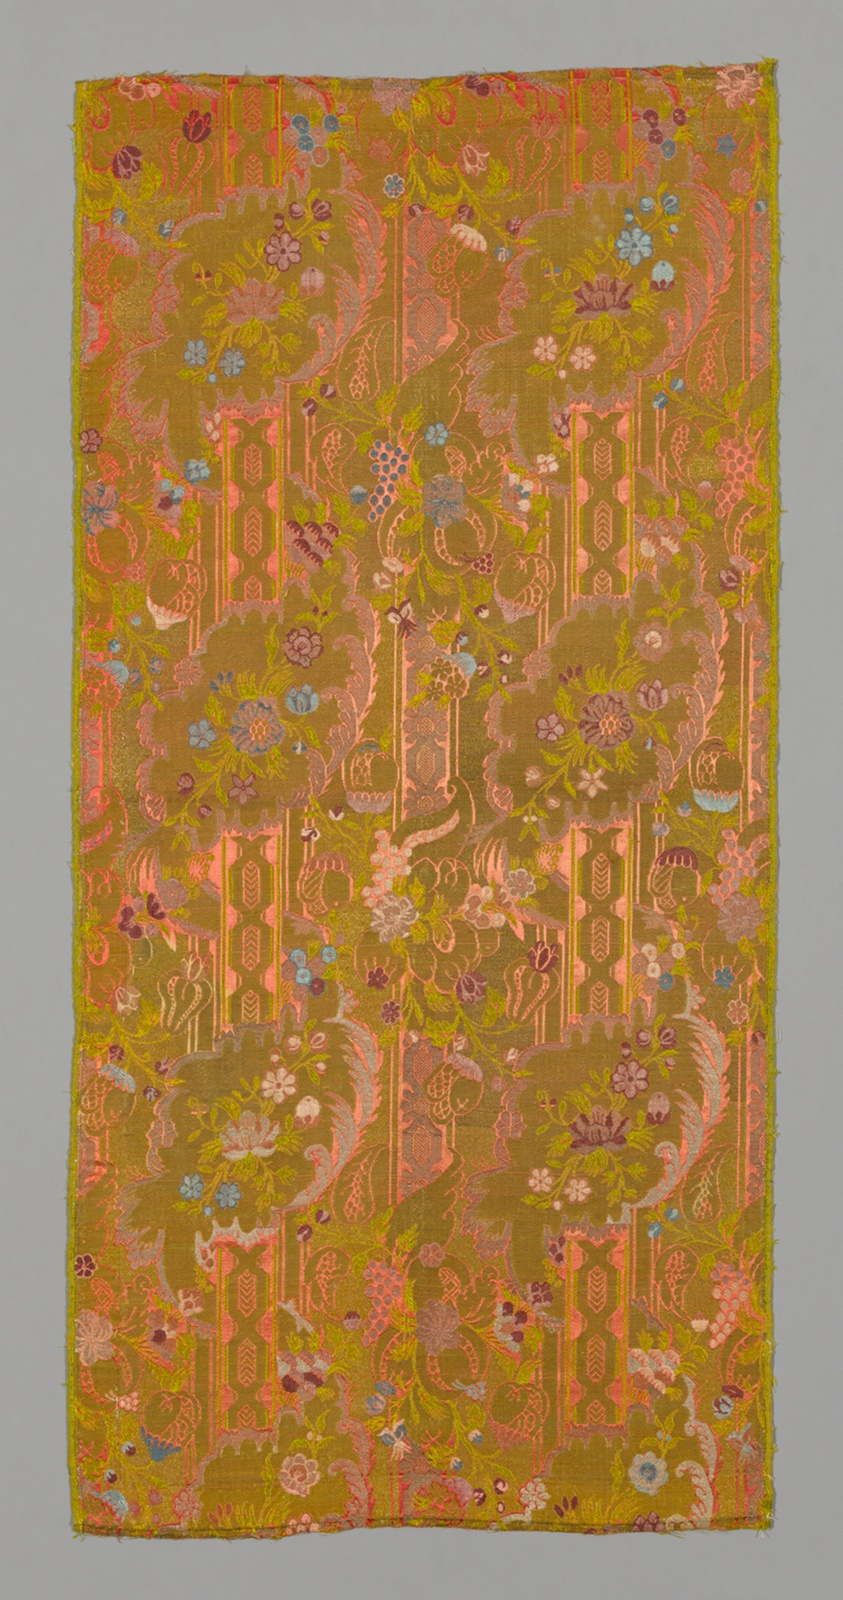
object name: Textile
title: Panel (Dress Fabric)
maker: France, Lyon or Italy, Venice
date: 1700/10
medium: Silk and gilt-metal-strip-wrapped silk, satin weave with twill interlacings of secondary binding warps and patterning and brocading wefts, and self-patterning ground wefts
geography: France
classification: textile; weaving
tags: foliage, fruit, flowers